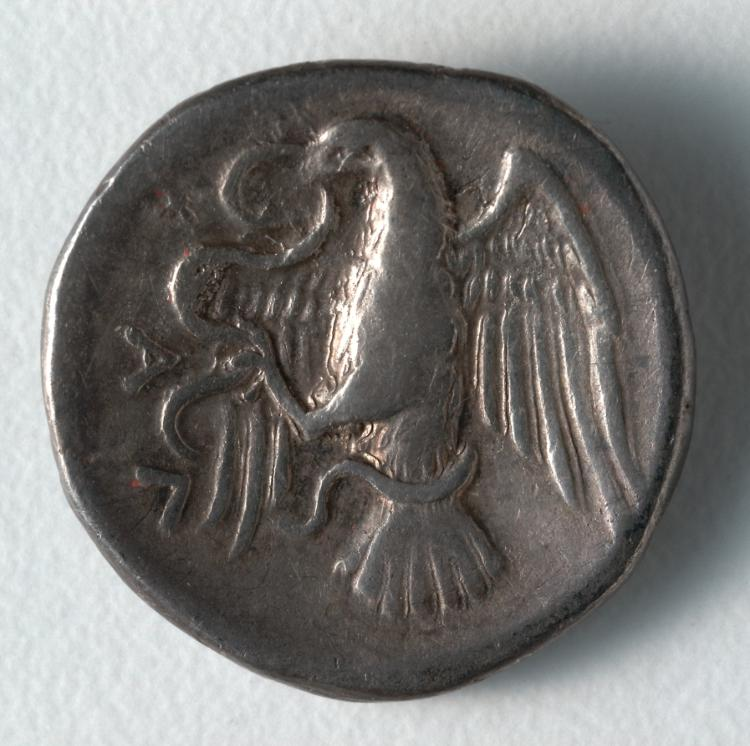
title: Drachm: Flying Eagle with Serpent (reverse)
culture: Greek, minted at Chalkis (Euboia)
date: 337–308 BCE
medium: silver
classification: Coins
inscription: ΧΑΛ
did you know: On the reverse is Chalkis’s 3-letter abbreviation ΧΑΛ (CHAL).